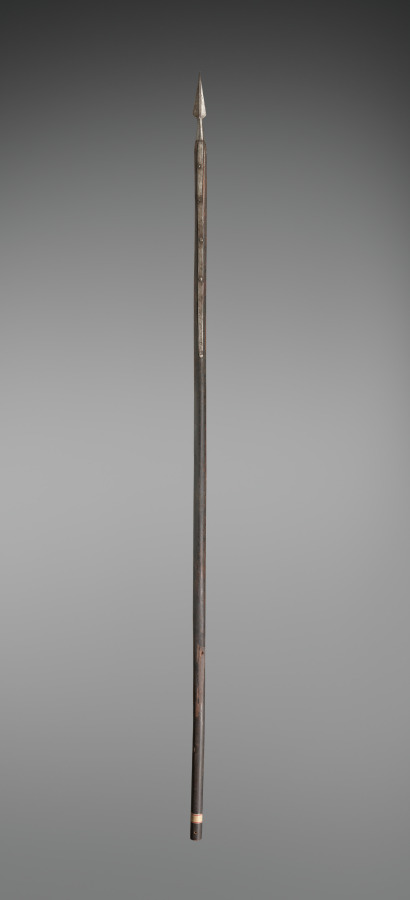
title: Banner With the Lion of St. Mark (pole)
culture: Italy, Venice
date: late 1600s - early 1700s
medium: wood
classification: Arms and Armor